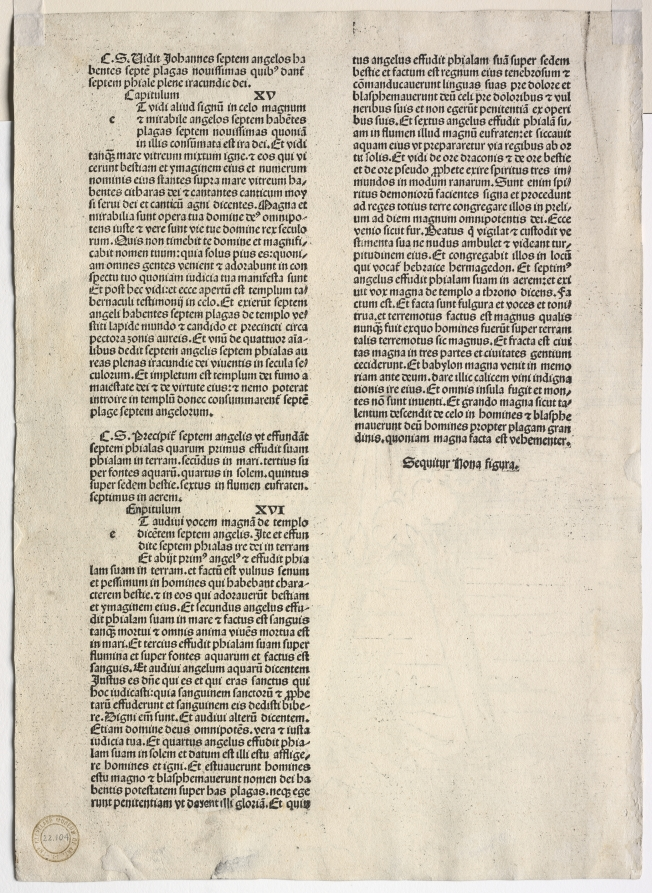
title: Revelation of St. John: St. John Devouring the Books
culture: Germany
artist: Albrecht Dürer (German, 1471–1528)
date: 1511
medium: woodcut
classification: Print